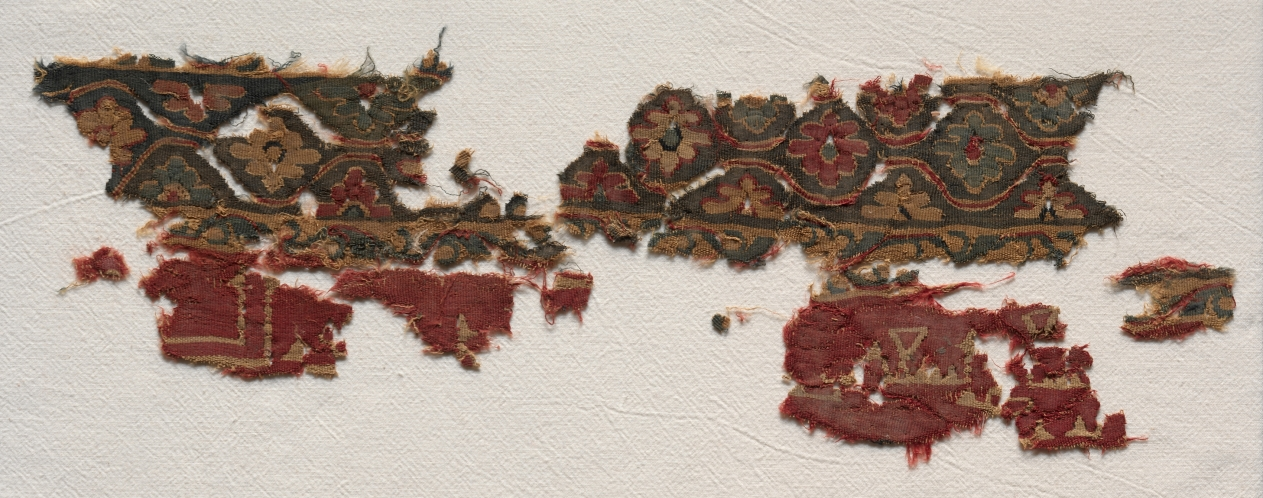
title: Tiraz with foliate band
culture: Egypt, Umayyad period (661–750) or Abbasid period (750–1258)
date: 717–718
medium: tapestry weave: linen and wool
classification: Textile